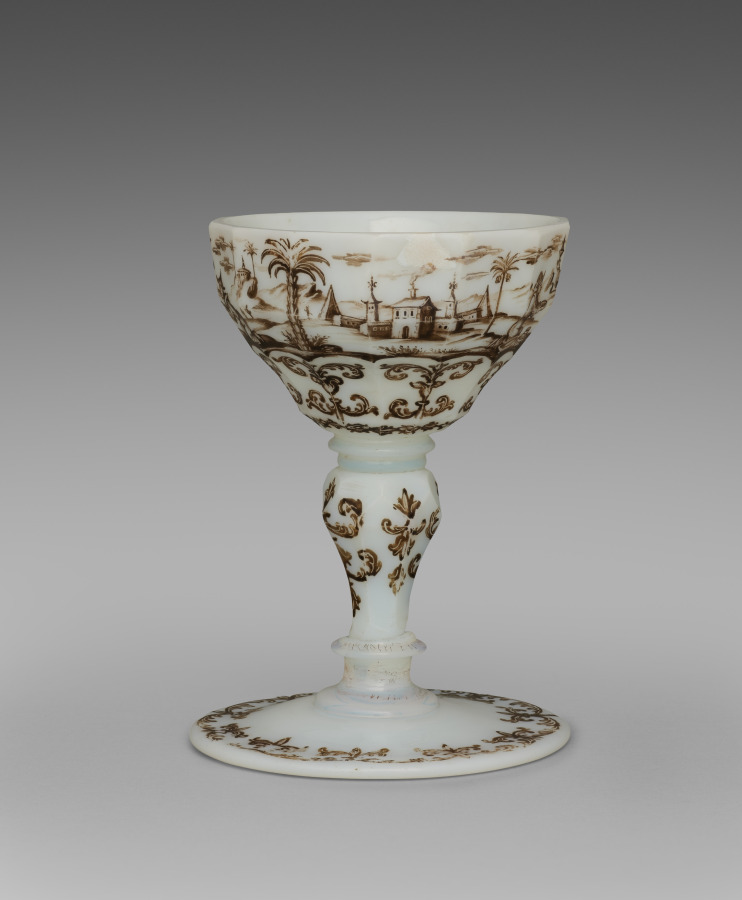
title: Cup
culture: Bohemia, 18th century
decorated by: Ignaz Preissler (Bohemian, 1676–1741)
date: c. 1735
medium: Opal glass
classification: Glass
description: This cup may have functioned as a vessel for an alcoholic beverage or as a container for food such as candies or pastries. Ignaz Preissler’s specialty was a technique known as Schwarzlot (“black lead” in German), in which a design was painted with black enamel and then fine details were scratched out with a needle. Preissler’s clients were primarily aristocrats who commissioned vessels as gifts or commemorative items and for whom the chinoiseriedecoration (imaginary European interpretations of Asian cultures), seen here, was fashionable.